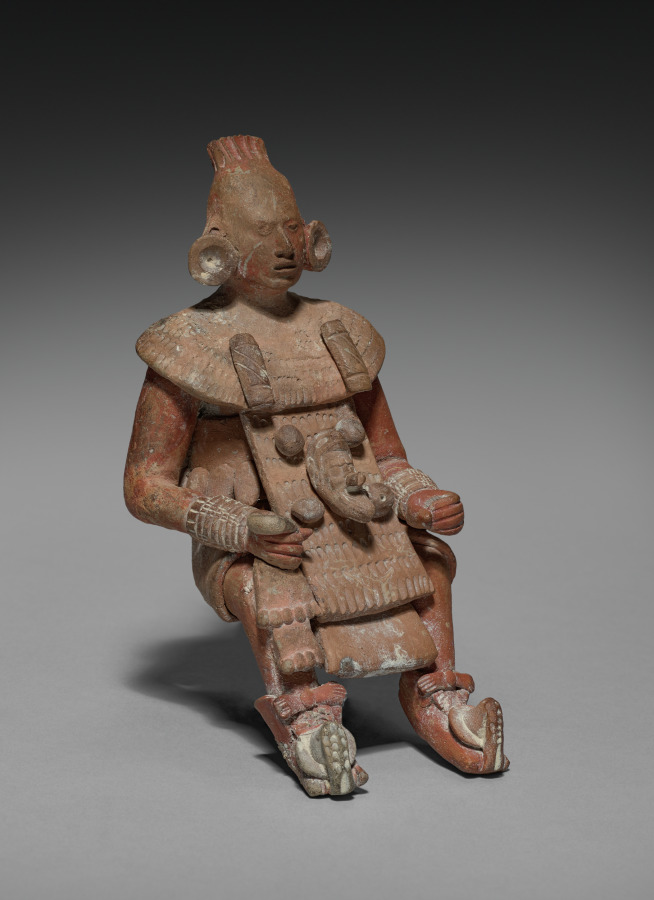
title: Seated Lord with Removable Headdress: Figure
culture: Mesoamerica, Maya, probably Jaina Island, Late Classical period, 7th-9th century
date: 600–800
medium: ceramic and slip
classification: Ceramic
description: The major Maya grave offerings on Jaina Island were ceramic figurines that depict deities and humans in a variety of roles. The seated figure represents a male, perhaps another warrior, who wears a huge zoomorphic headdress. A skeletal face with articulated jaw descends from the headdress to fit as a mask over the figure’s face.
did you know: It is estimated that some 20,000 people were buried on the tiny island of Jaina over a 500-year period.